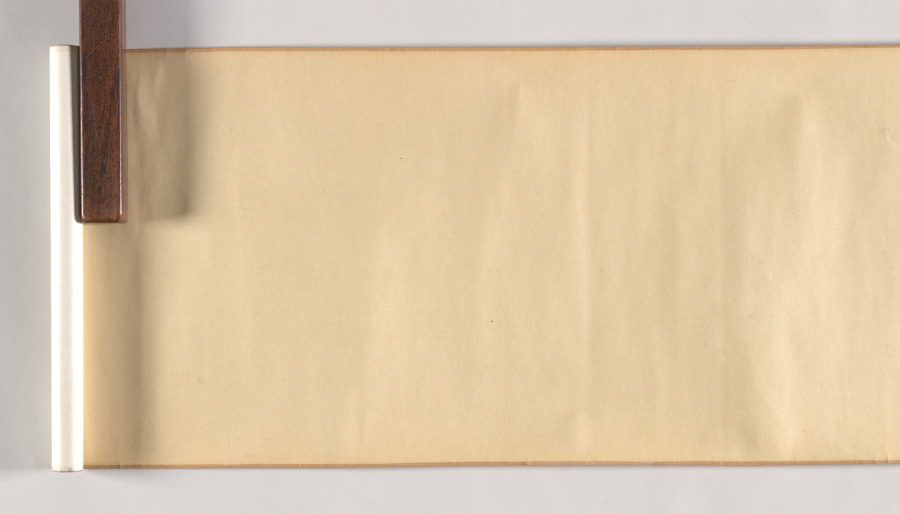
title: Three Horses and Four Grooms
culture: China, Yuan dynasty (1271-1368)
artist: Ren Renfa (Chinese, 1254–1328)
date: c. 1320s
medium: handscroll, ink and color on silk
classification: Painting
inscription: 月山道人. [印] 任氏子明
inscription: 1 colophon and 16 additional seals: 1 poem, 1 colophon dated 1552 or 1612, and 3 seals of Wang Yiying 王一瀛 (1500s); 2 seals of Liang Qingbiao 梁清標 (1620-1691); 6 seals of the Qianlong 乾隆 Emperor (r. 1736-95); 3 seals of the Jiaqing 嘉慶 Emperor (r. 1796-1821); 1 seal of the Xuantong 宣統 Emperor (r. 1908-12); 1 seal of Yu Xiezhong 余協中 (1900s).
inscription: Poem and colophon by Wang Yiying 王一瀛 (1500s): As for painters of horses in the previous dynasty, Surely the name of Yueshan [Ren Renfa] must come first. Under his brush and on his silk, They seem to have just galloped out from the imperial stud. Now as the world overflows with inferiority, Who, from the stable, can recognize a dragon-horse amidst mediocrity. Ren Yueshan [Ren Renfa] of the Yuan Dynasty was best in horse paintings. The three fine steeds he painted in this scroll are so dashing, so vigorous in spirit that they have indeed grasped some of the "brush-idea" of Han Gan. Not long ago this painting came into the possession of Mr. Gui Shanquan, who asked for my inscription. And I, while reading the old manuscripts of Hengshan [Wen Zhengming, 1470-1559], by accident, came cross the poem quoted above. As the ancients said "in painting horses, Master Han was [inspired by and produced] real horses; in composing poems, Master Su [Su Dongpo, the leading Song poet] wrote as if a painting were before him." These are truly what should be considered the two excellences; indeed, they are to be treasured. In the sixth month of the renzi year [either 1552 or 1612]. Jian feng shan ren [The Mountain Dweller of the Sword Peak], Wang Yiying, written in the Qu si ting Pavilion at Chiyang.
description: Ren Renfa's horse images are elegant in appearance and vigorous in spirit. His work attracted not only Chinese scholars but also the Mongols at the imperial court. Inspired by the contemporary scholarly interest in restoring a sense of antiquity in art—an artistic direction led by Zhao Mengfu that exerted a great impact in the Yuan art scene—Ren Renfa, like Zhao Mengfu, modeled his depictions of horses after the Song master Li Gonglin. Another key style component that Ren introduced to this genre was a revival of the Tang classical tradition. The refined color treatment of the horses as seen here was derived from the Tang master Han Gan.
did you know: Only the elegant first horse with a white blaze is accompanied by two grooms, as if its lightning speed required extra supervision.